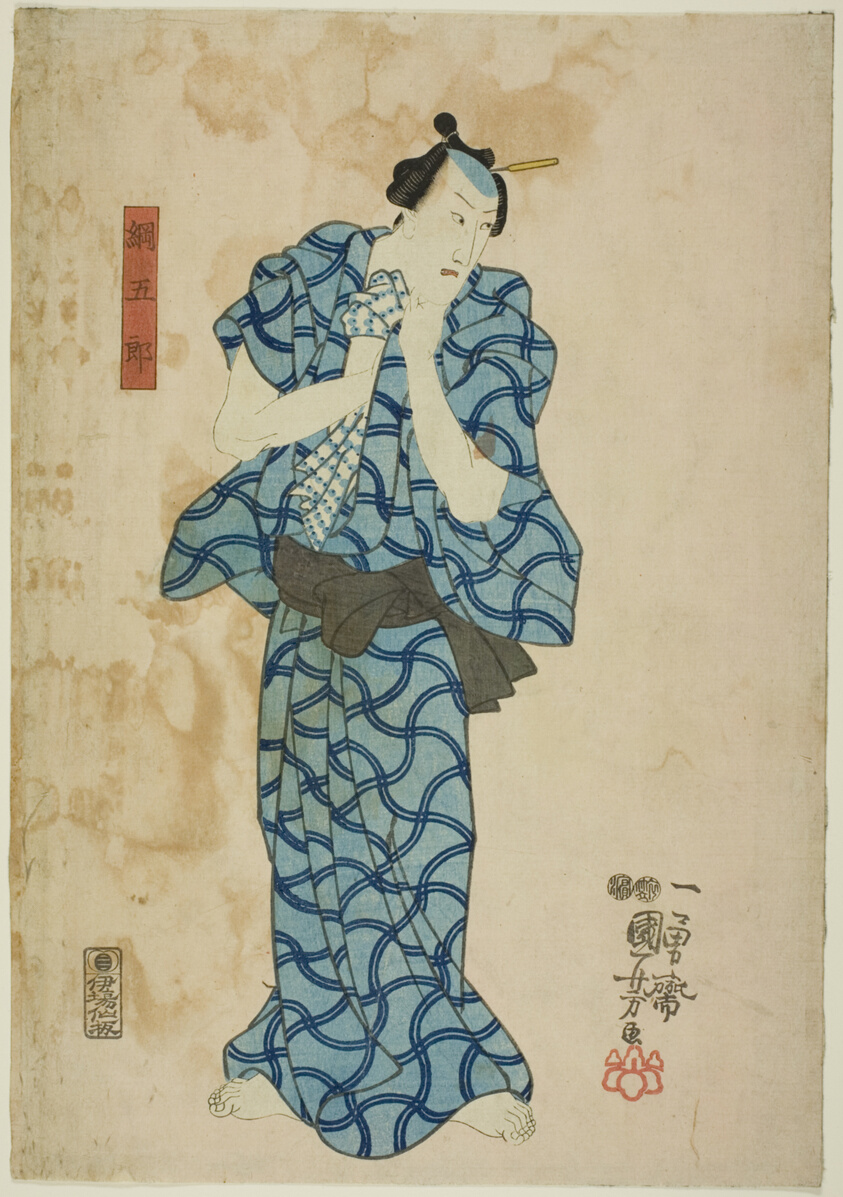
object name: Print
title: The actor Ichikawa Danjuro VIII as Tsunagoro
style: Japanese (culture or style)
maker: Utagawa Kuniyoshi (Japanese, 1797-1861)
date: 1847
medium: Color woodblock print; left sheet of oban diptych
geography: Japan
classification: woodblock print; print; asian art